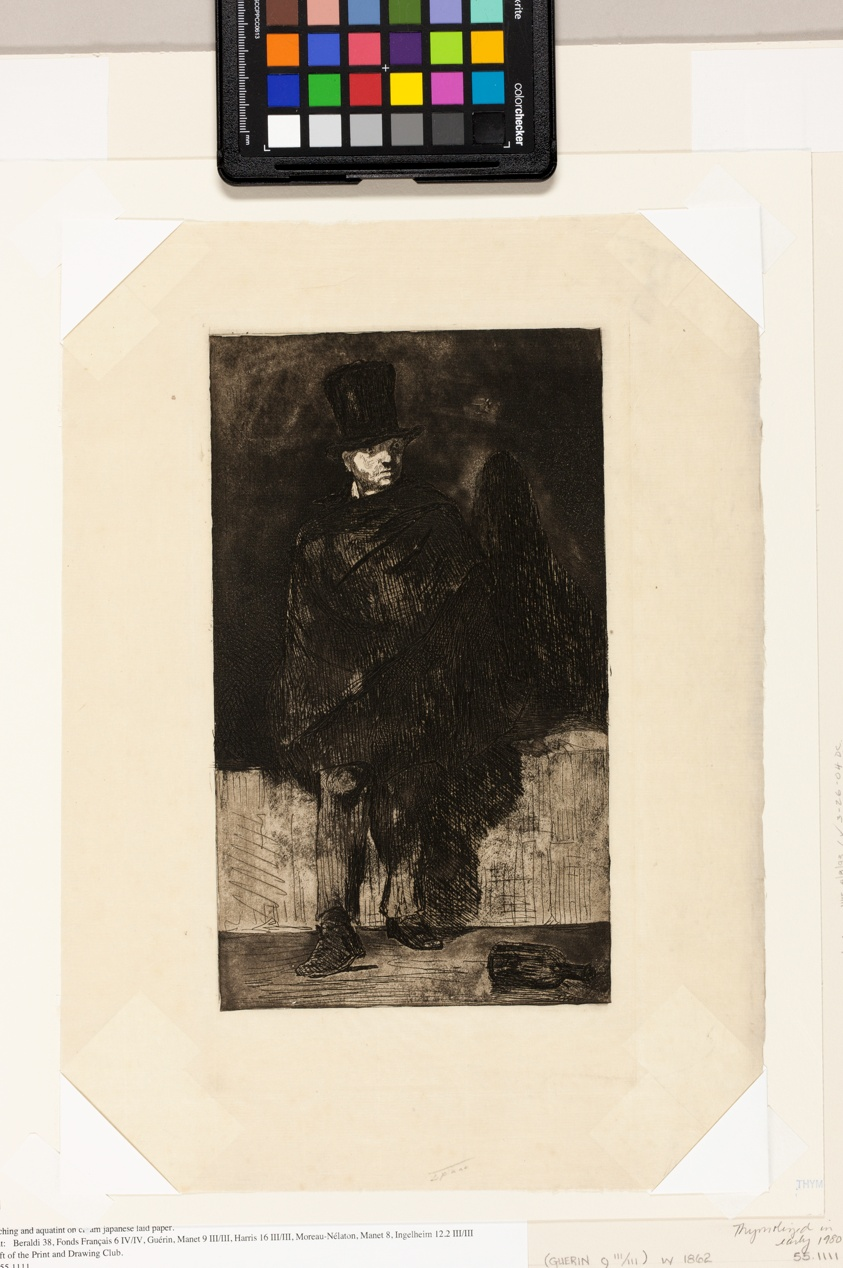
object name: Print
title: The Absinthe Drinker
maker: Édouard Manet (French, 1832-1883); assisted by Félix Henri Bracquemond (French, 1833-1914); published by (possibly) Alfred Porcabeuf (French, 19th-20th centuries)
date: 1867–68 or 1874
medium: Etching and aquatint in black on cream Japanese laid paper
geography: France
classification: etching; print; prints and drawing